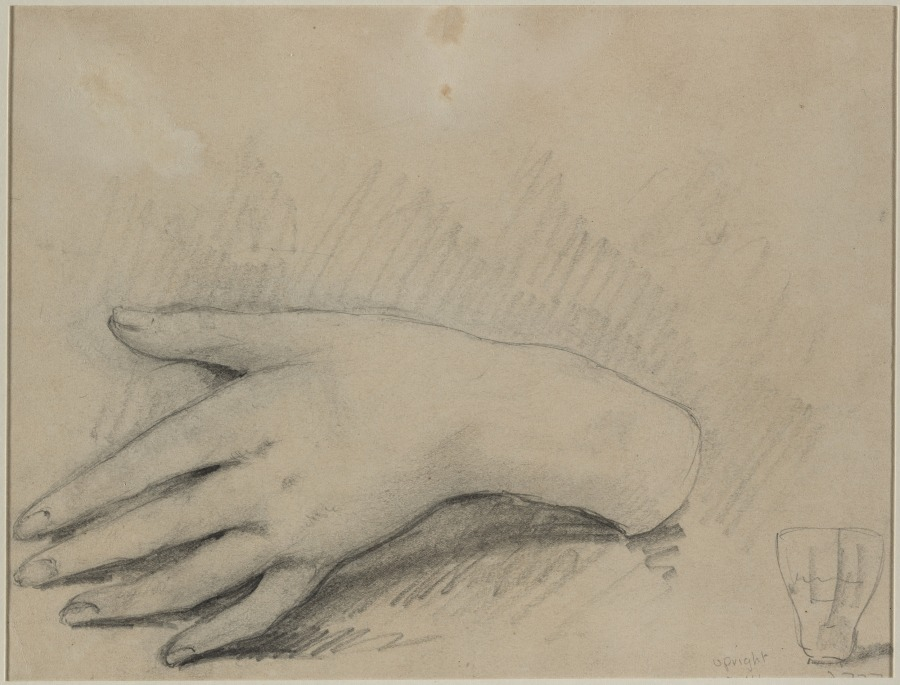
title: Study of a Woman's Hand (verso)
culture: France, 19th century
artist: Théodule Ribot (French, 1823–1891)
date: 1800s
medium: graphite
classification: Drawing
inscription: inscribed in black ink, lower center; "Th. Ribot (estate stamp)